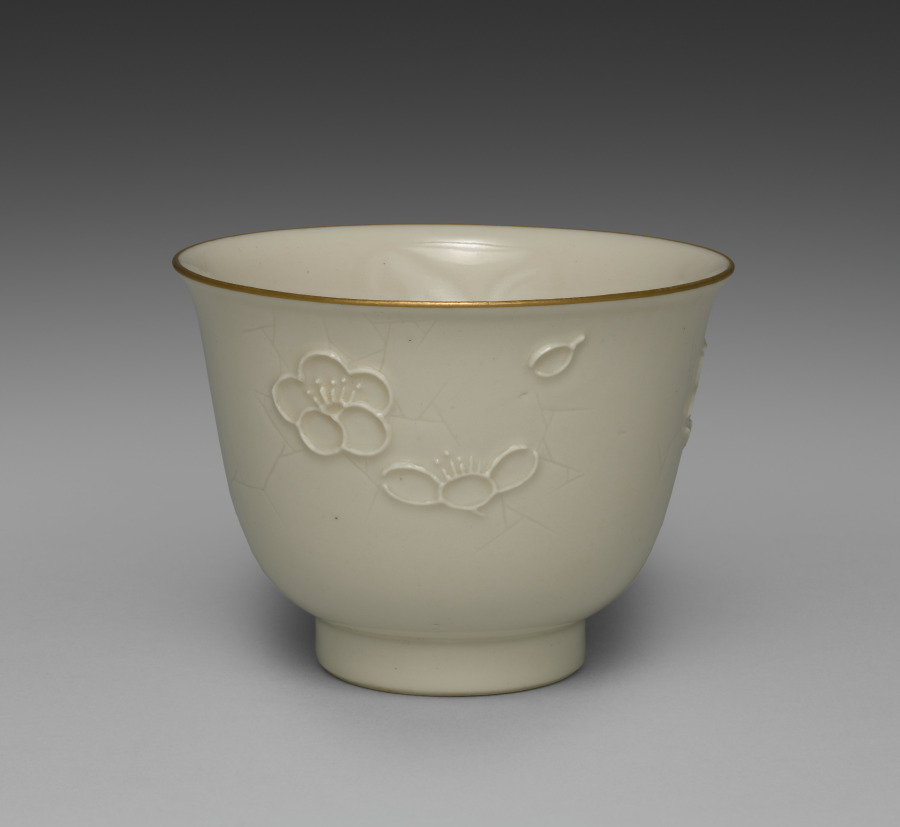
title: Drinking Cup from Dining Set with Plum Blossoms and Cracked-Ice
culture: Japan, Meiji period (1868–1912)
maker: Seifū Yohei II (Japanese, 1844–1878)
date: c. 1875–78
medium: Porcelain with molded designs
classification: Ceramic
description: Each item in this set has a delicate low-relief design of flowering plum branches over scattered, intersecting lines meant to resemble the cracked-ice surface of a frozen body of water and is signed on the base in gold pigment. While Yohei II produced many fine works in underglaze blue, like those produced by Kiyomizu Shichibei, he also made works in quite different styles later in his career, from the early 1870 s. In 1873, he was appointed purveyor to the Industrial Center of Kyoto Prefecture, a designation associated with Kyoto’s efforts to reach an international market through the port of Kobe; and from 1875 until his death, he was involved in national-level projects to present Japanese ceramics across the world. It was during this period that Yohei III was apprenticed to Yohei II, and it has been suggested that this set may in fact be an early example of Yohei III’s work, which he signed with his teacher’s name. Decorated with flowers resembling Japanese textile motifs, the set calls to mind the design of Yohei II’s pair of vases with plum blossoms in the Victoria and Albert Museum. Here, the elaborate trees created for a formal public exhibition setting have been translated into the approachable blossoms of the genteel domestic environment. While the designs are consistent across the pieces, each raised flower petal and pistil and each incised line in the ice was done by hand, so the cups, bowls, and dishes are similar yet unique. The bottoms of two boxes once identified the set’s owner, but the information has been deliberately obscured with black ink. However, inscriptions still visible appear to indicate two occasions, once at the end of July 1886 , and once again in June 1916 , when parts of the set were requested from Hokura in Niigata Prefecture. The location corresponds to a neighborhood in the present-day city of Jōetsu. The surname Tsuji 辻 also appears on a paper tag affixed to one of the box cloths. Future research may possibly reveal more about their provenance. A vase by Yohei III in a private collection combines the formal grandeur of the Yohei II vases in the Victoria and Albert Museum with the gentler design of this dining set, placing flowering plum trees against soft, scalloped-edge clouds resembling those in golden screens.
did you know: The dining wares have a creamy white coloration that the four boxes containing them identify as Korean in style.